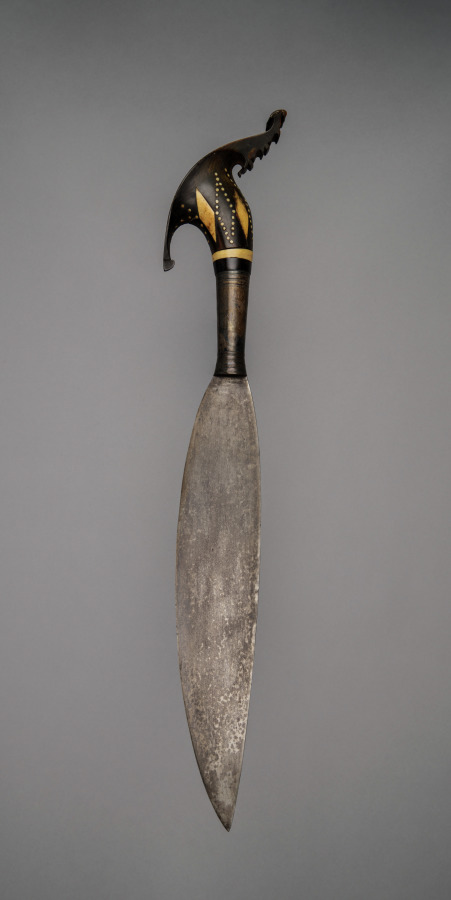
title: Sword (Barong)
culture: Philippines, Mindanao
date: before 1918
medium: Blade: metal; grip: silver; handle: wood with ivory inlay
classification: Arms and Armor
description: This sword has a broad, leaf-shaped blade characteristic of the Sulu Archipelago. Its profile suggests it was used for powerful cut-and-slash fighting. The hilt, carved from kamagong hardwood, terminates in an elongated ivory cockatoo (kakatua) pommel. Decorative ivory inlay is embedded into the kamagong surface, forming geometric and dotted patterns that follow the natural curves of the hilt.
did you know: This object’s ivory inlay is unusual—bone or mother of pearl were more common.